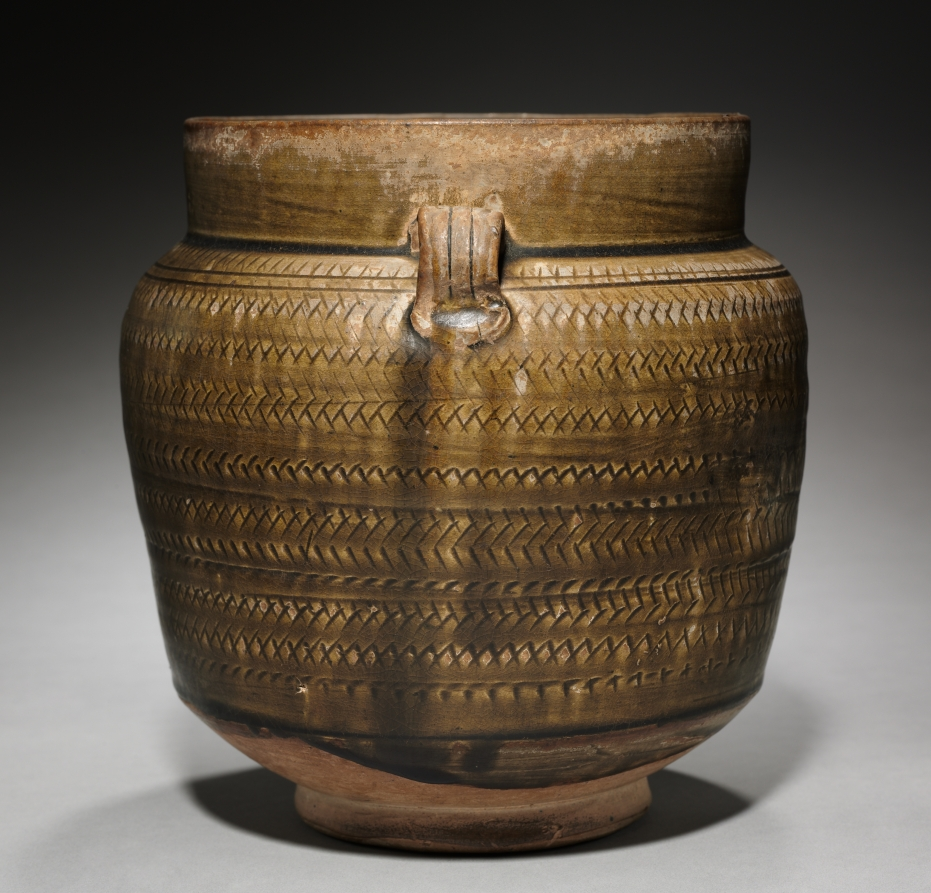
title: Jar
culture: China, Northern, Tang dynasty (618-907) - Five dynasties (907-960)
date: 800s–900s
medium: Glazed pinkish-buff stoneware; Brown ware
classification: Ceramic